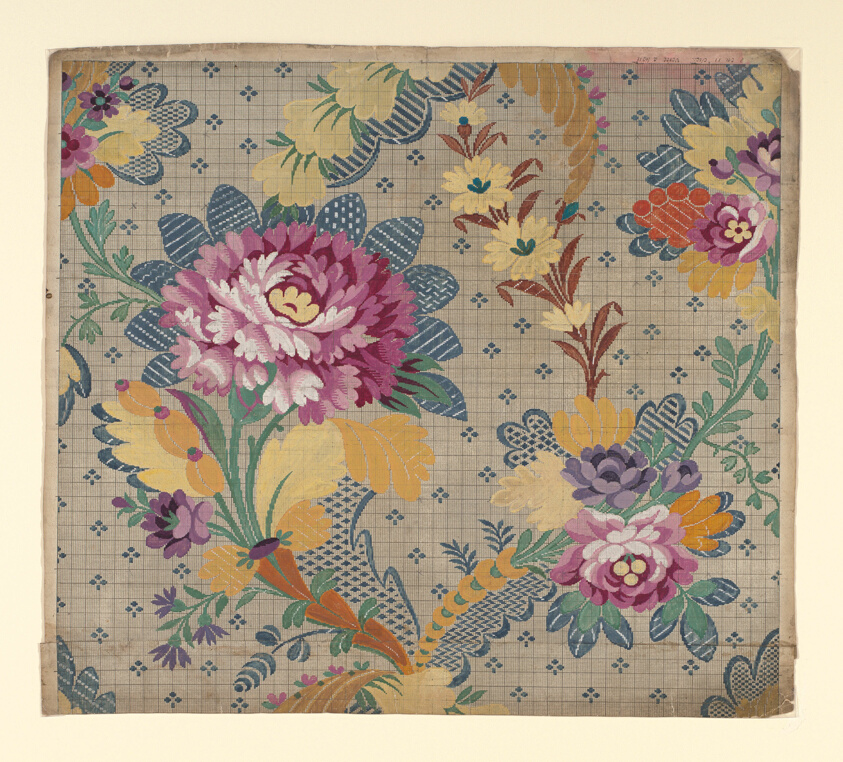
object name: Drawing and Watercolor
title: Mise-en-carte (Point-paper)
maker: Designed by Germain Frères; France, Lyon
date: 1785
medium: Ink and gouache on hand drawn graph paper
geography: France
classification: textile; accessory - paper design